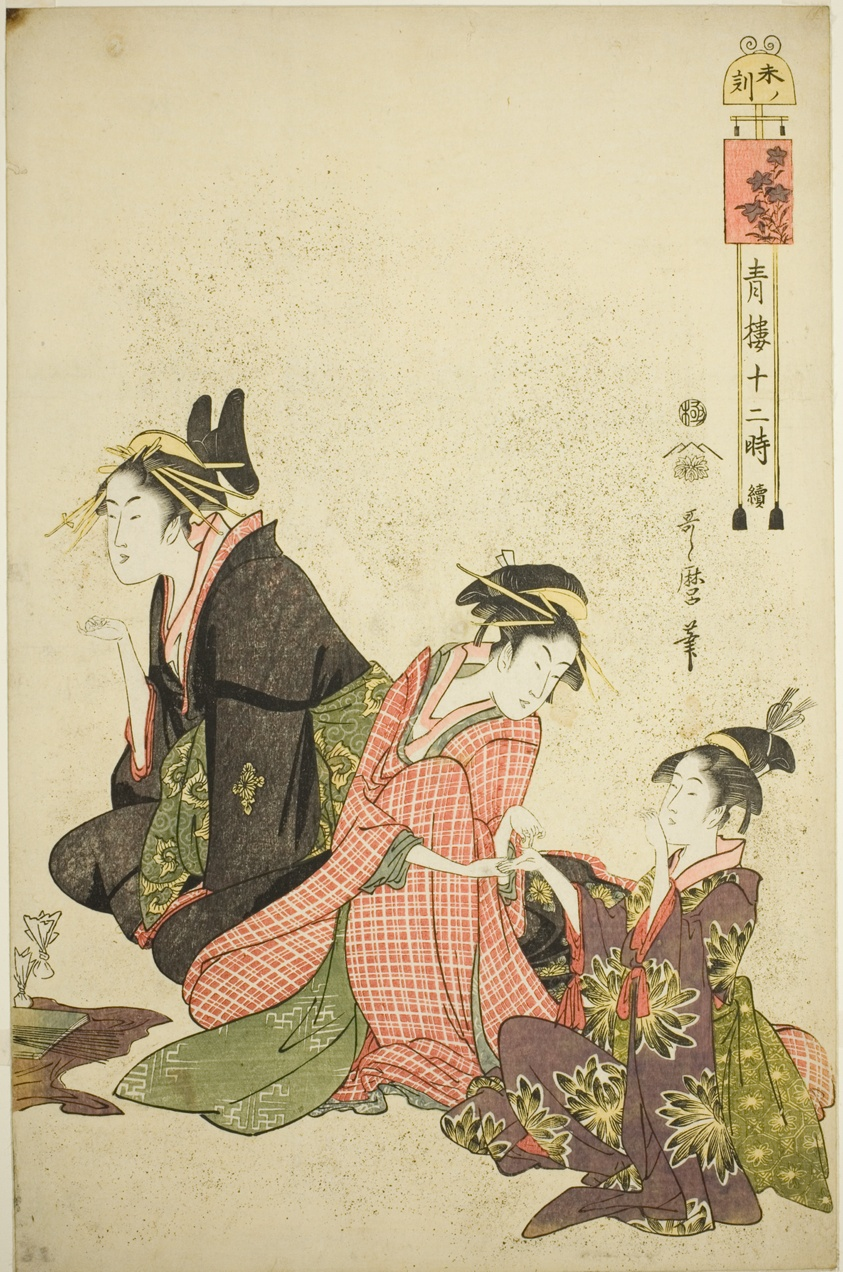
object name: Print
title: Hour of the Sheep (Hitsuji no koku), from the series "Twelve Hours in Yoshiwara (Seiro juni toki tsuzuki)"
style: Japanese (culture or style)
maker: Kitagawa Utamaro 喜多川 歌麿; Japanese, 1753 (?)-1806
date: c. 1794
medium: Color woodblock print; oban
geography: Japan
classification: woodblock print; print; asian art